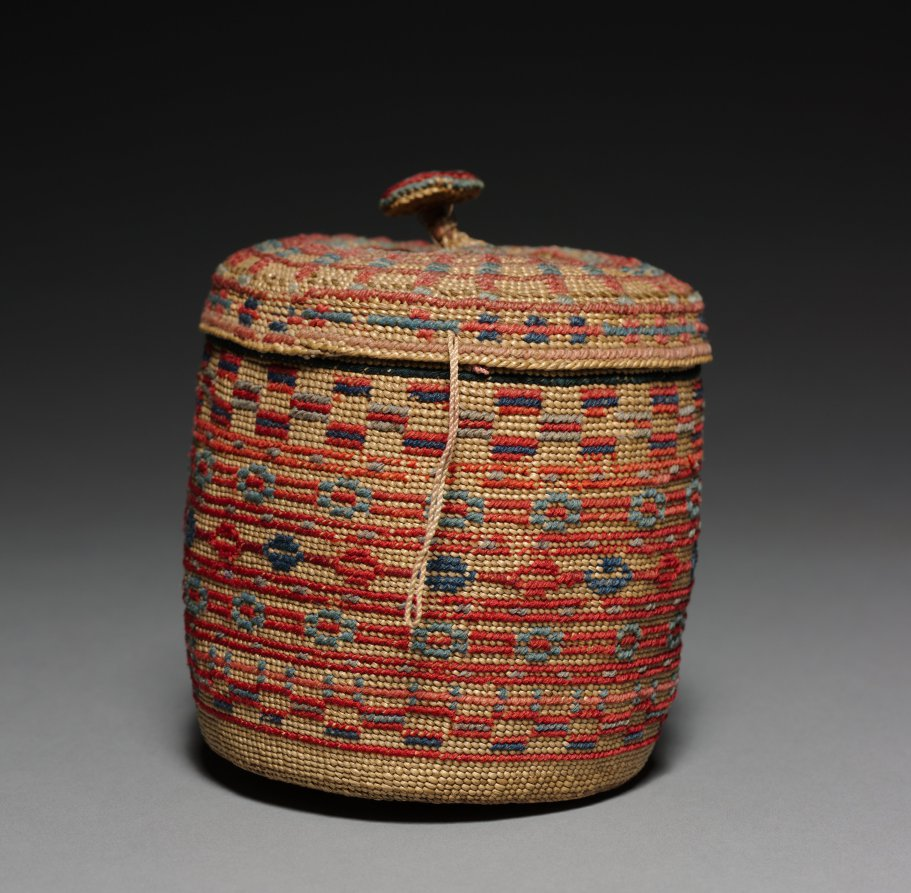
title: Covered Basket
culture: Arctic, Aleut, late 19th-early 20th century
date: late 1800s–early 1900s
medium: wool embroidery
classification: Basketry